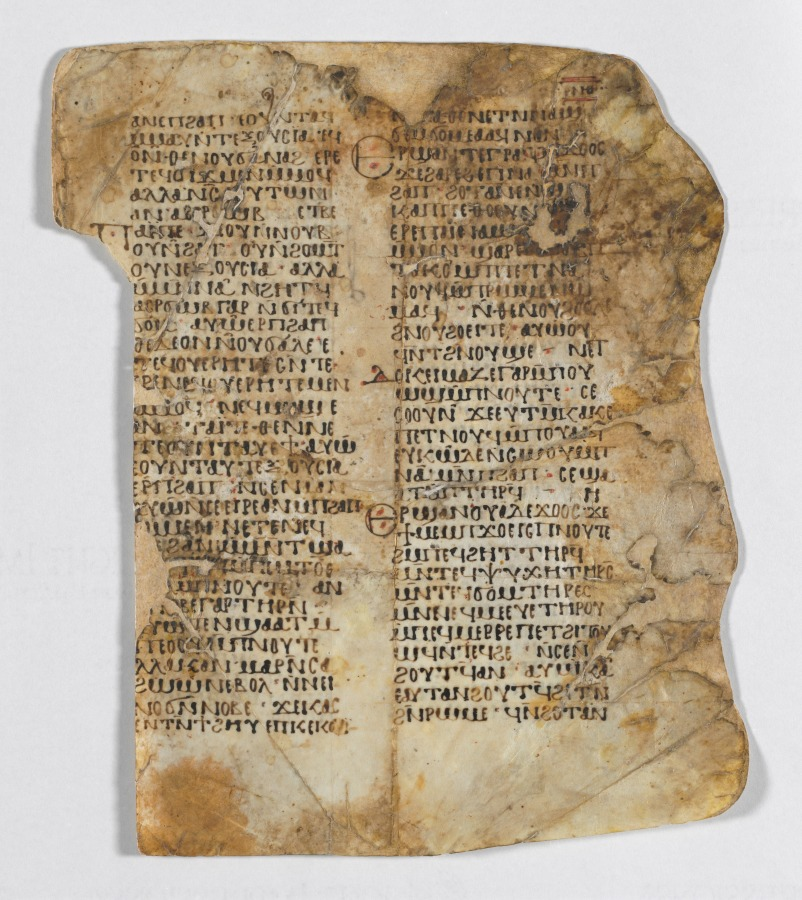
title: Leaves from a Christian Homily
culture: Egypt, Coptic period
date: 500s-600s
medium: ink on vellum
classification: Manuscript